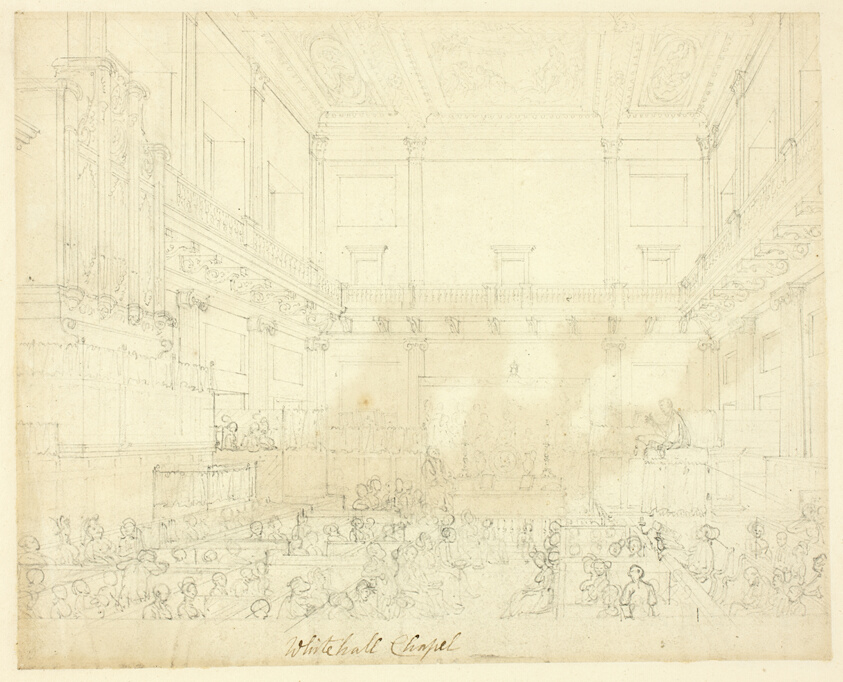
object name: Drawing and Watercolor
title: Study for Whitehall Chapel, from Microcosm of London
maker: Augustus Charles Pugin (English, born France, 1762-1832); Thomas Rowlandson (English, 1756-1827)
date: c. 1809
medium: Graphite on ivory wove paper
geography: England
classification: graphite; drawings (visual works); prints and drawing